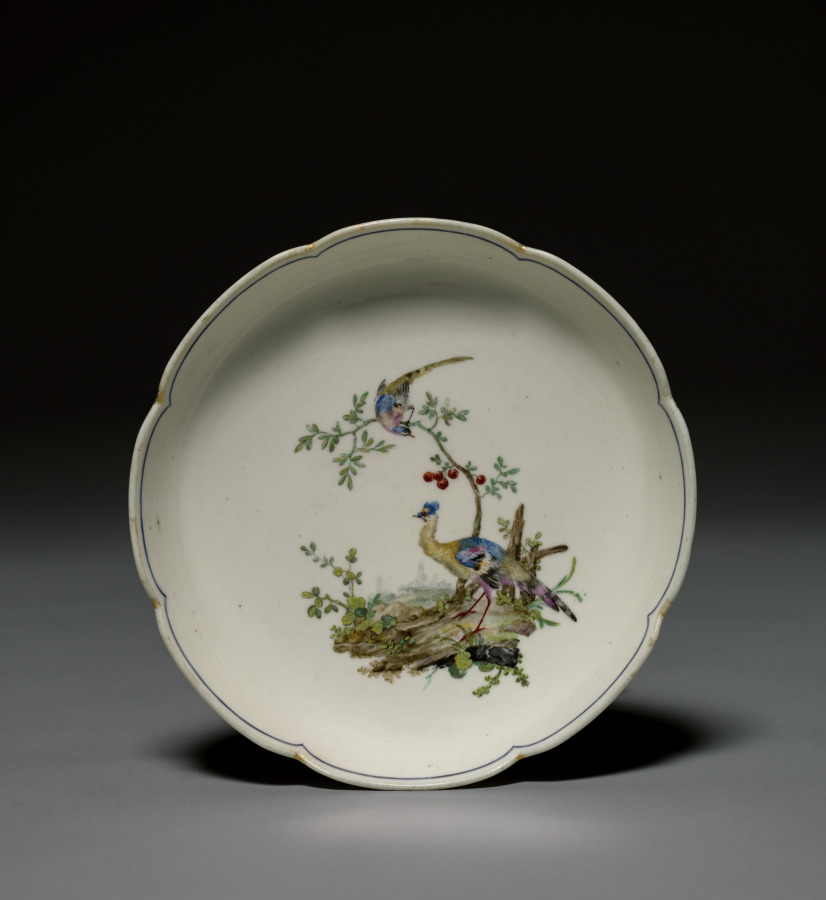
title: Bowl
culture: France, Mennecy, 18th century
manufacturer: Mennecy Factory (French)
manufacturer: Mennecy- Villeroy Factory (French)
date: c. 1765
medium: soft-paste porcelain with enamel and gilt decoration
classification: Ceramic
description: As European porcelain production advanced over the course of the 18th century, factories borrowed designs and techniques from one another in order to remain competitive in the porcelain market. This plate’s painted composition with two birds in the foreground, may have been inspired by bird paintings produced at the Vincennes porcelain factory beginning in the late 1740s.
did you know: The Vincennes porcelain factory’s royally supported monopoly for the creation of porcelain that emulated the German style forced the Villeroy factory to relocate to Mennecy in 1748.